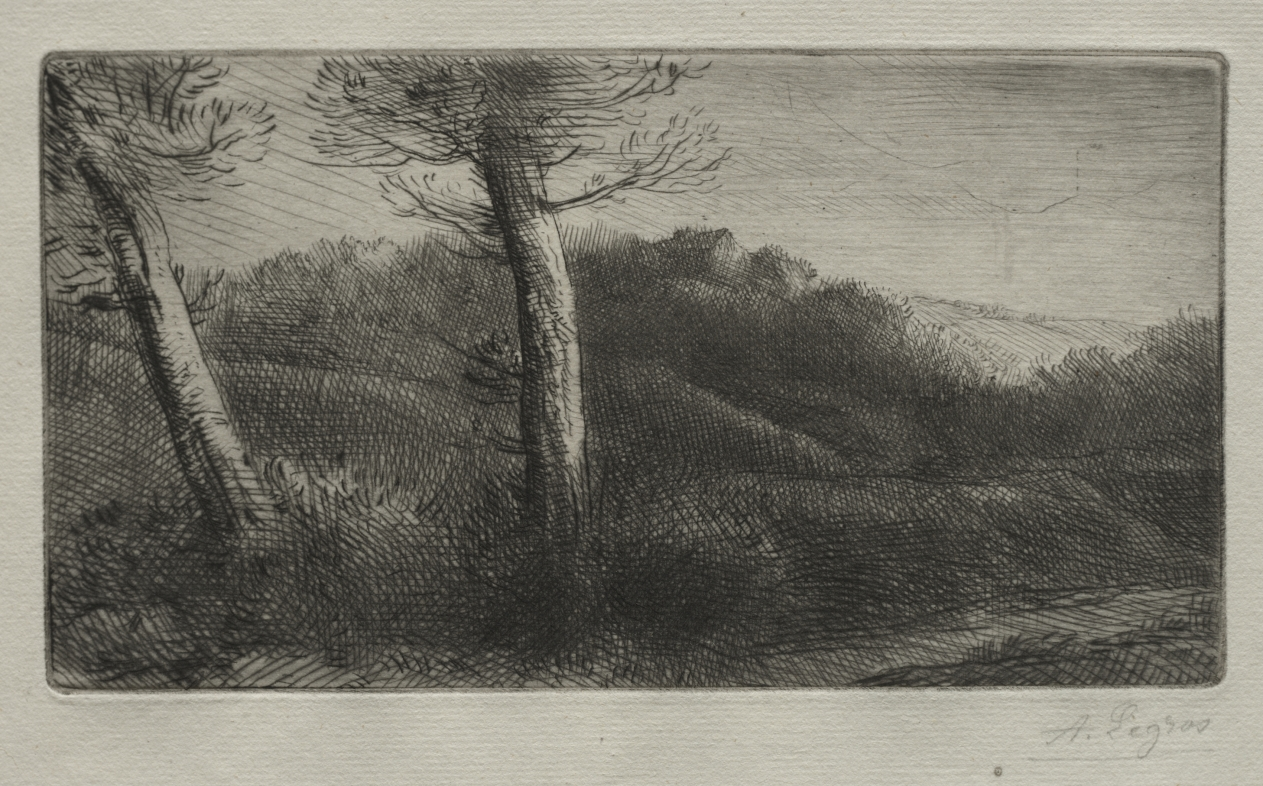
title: The Traveler Stretched out on the Grass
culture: France, 19th century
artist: Alphonse Legros (French, 1837–1911)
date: c. 1888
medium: drypoint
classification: Print